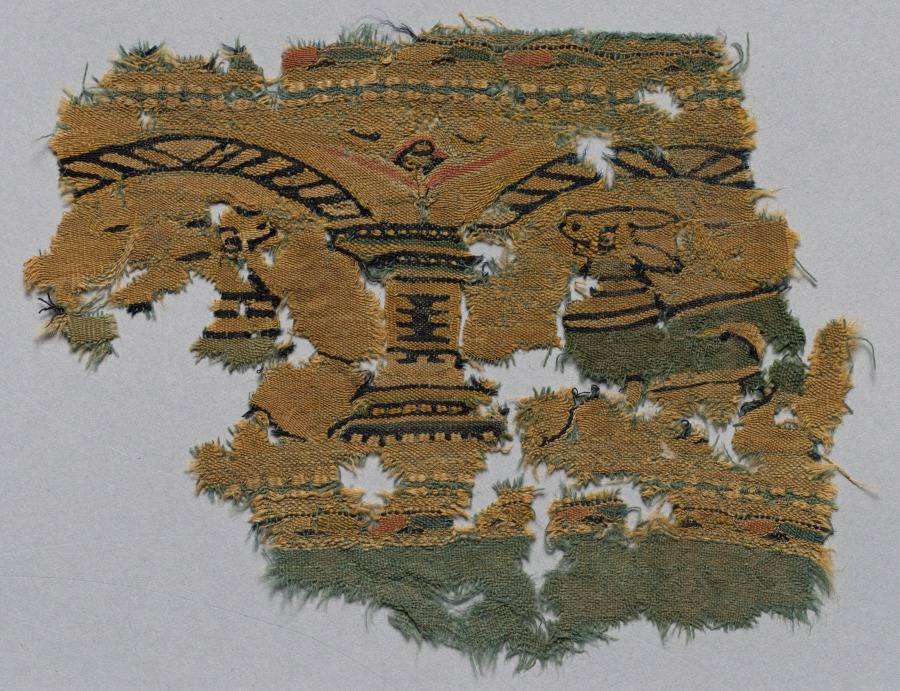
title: Fragment of a Band (?)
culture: Egypt, Umayyad period (661–750)?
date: 700s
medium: tabby ground, inwoven tapestry ornament; wool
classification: Textile